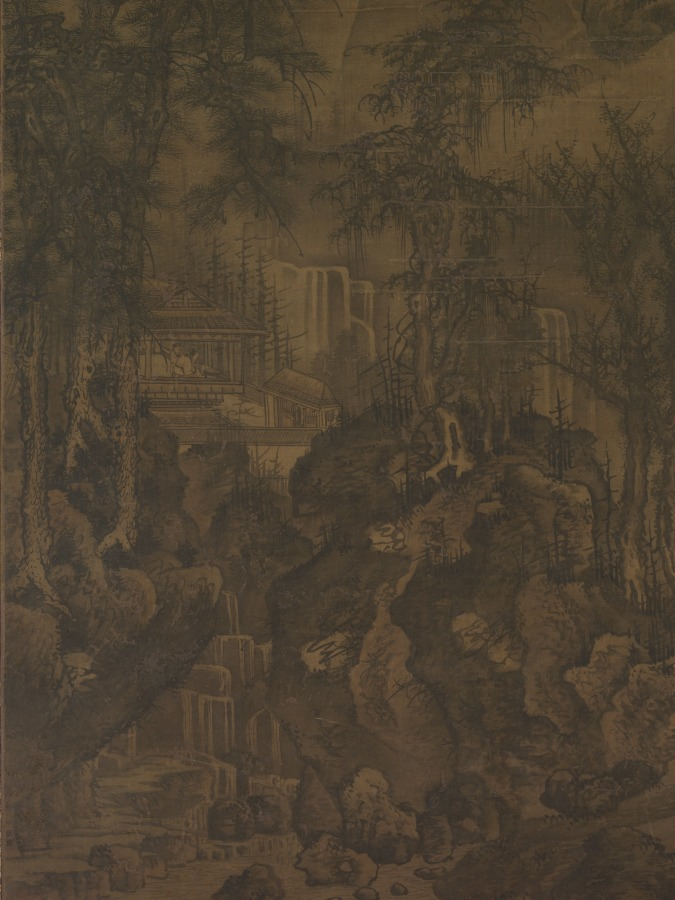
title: Landscape in the Style of Juran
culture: China, Ming dynasty (1368–1644)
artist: attributed to Liu Du (Chinese, active c. 1628-after 1653)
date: 1368–1644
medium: Hanging scroll mounted as a panel; ink and slight color on silk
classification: Painting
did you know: There is a tiny apocryphal signature under the overhanging rocks on the lower left side.